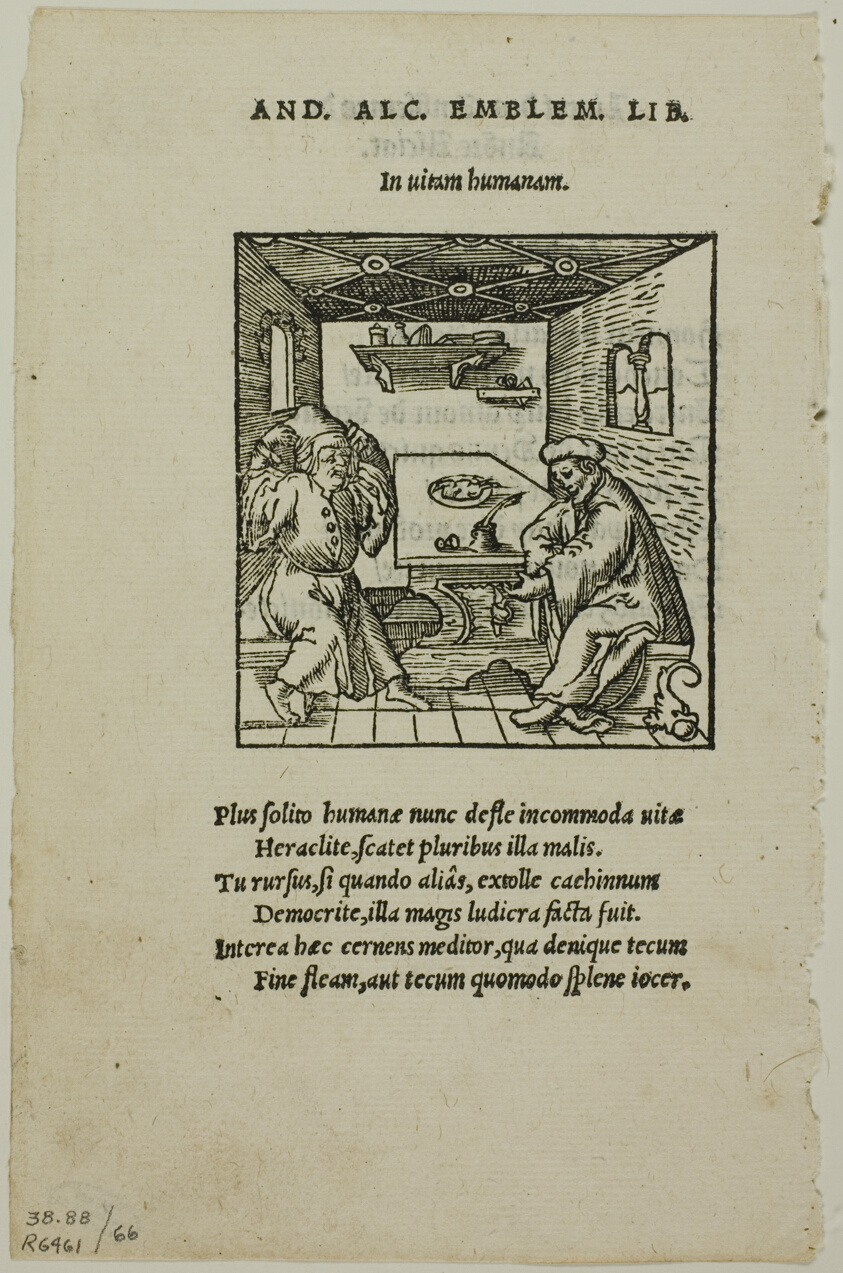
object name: Print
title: Illustration from Livret des Emblemes by Andreas Alciatus, plate 66 from Woodcuts from Books of the XVI Century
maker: Unknown Artist (French, 16th century); assembled by Max Geisberg (Swiss, 1875-1943)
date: 1536, assembled into portfolio 1937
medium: Woodcut on paper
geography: France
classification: woodcut; print; prints and drawing